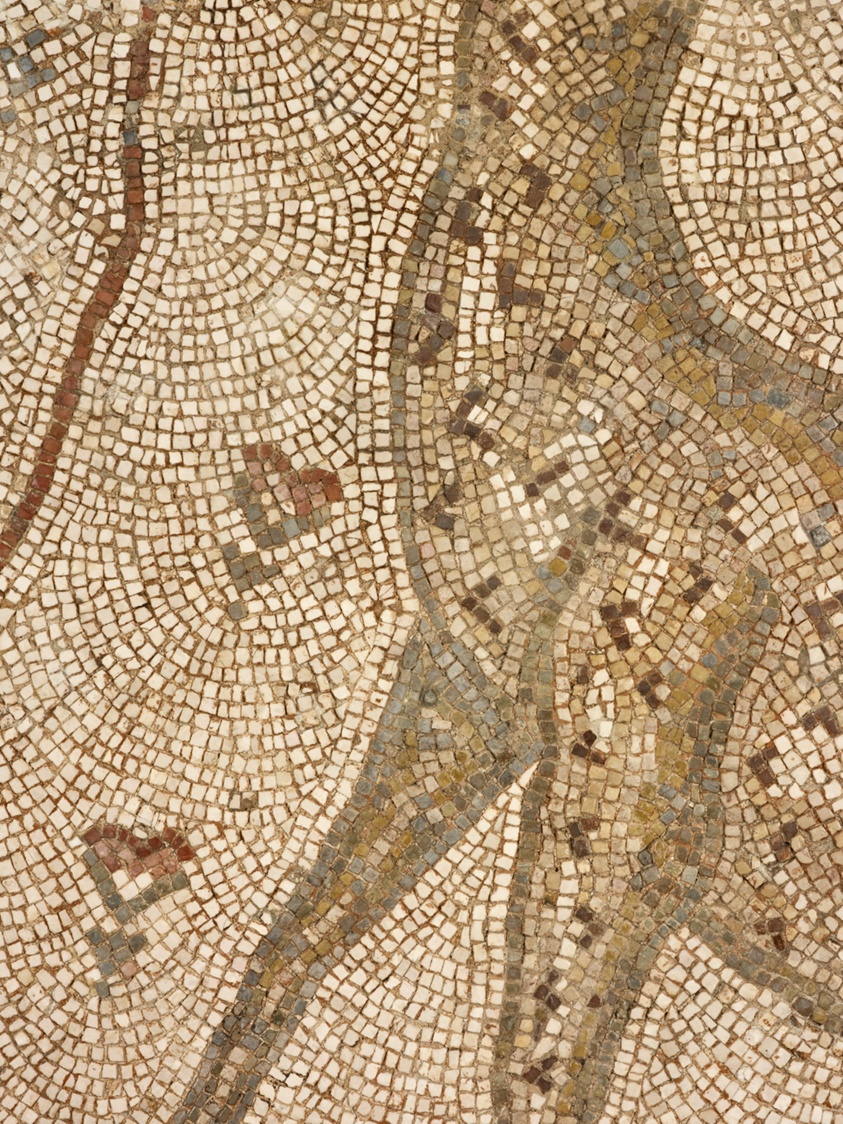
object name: Architectural fragment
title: Mosaic Fragment with Man Leading a Giraffe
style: byzantine, ancient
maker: Byzantine; Syria or Lebanon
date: 5th century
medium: Stone in mortar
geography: Tyre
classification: architectural fragment; mosaic; ancient art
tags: animals, men